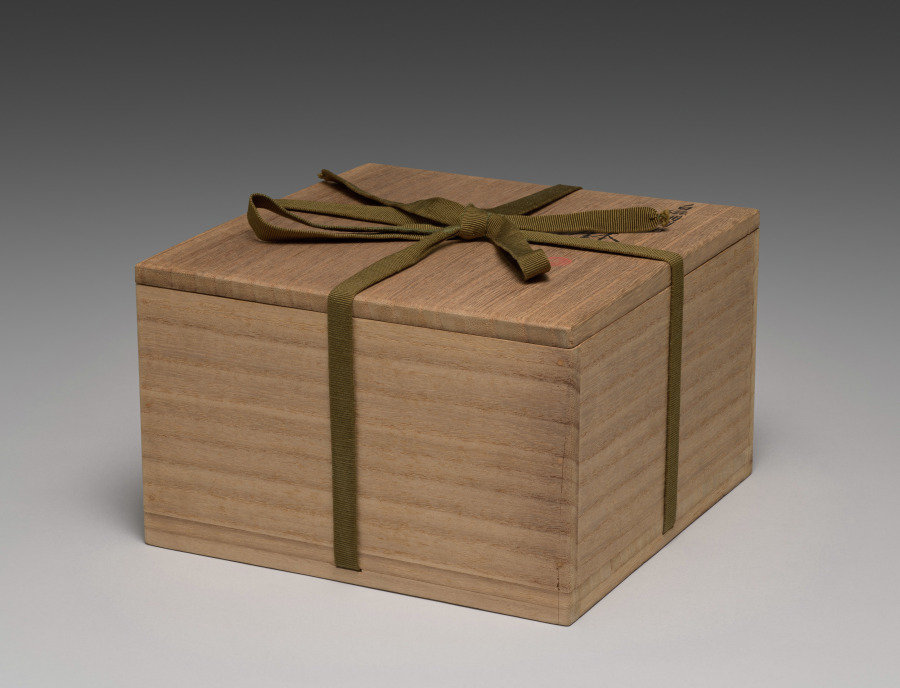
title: Sweets Bowl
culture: Japan, Taishō period (1912–26) or Shōwa period (1926–89)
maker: Seifū Yohei IV (Japanese, 1872–1951)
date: 1914–46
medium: Porcelain with coral red glaze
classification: Ceramic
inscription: 清風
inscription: 成山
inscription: 清風造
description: Like his father, Yohei IV also produced works with red monochrome glazes, like this red coral–glazed sweets bowl with white interior.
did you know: Seifū Yohei IV was active at home and abroad and won international recognition for his ceramic's glazes and designs.